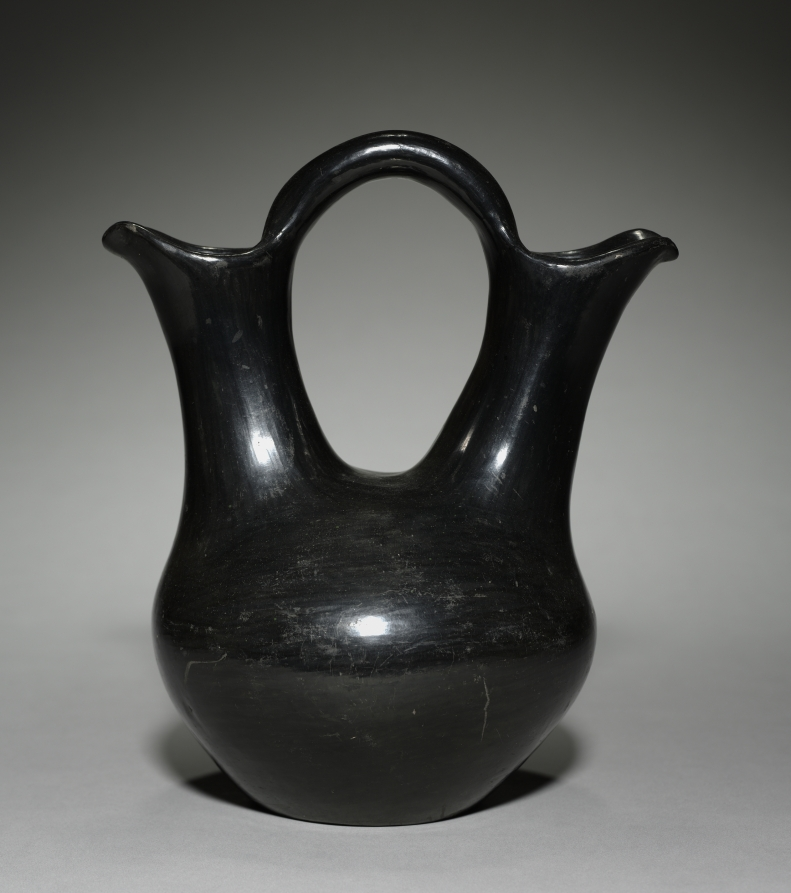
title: Wedding Jar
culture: Southwest, Pueblo, Santa Clara, Post-Contact, 20th century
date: c. 1900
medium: ceramic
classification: Ceramic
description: At Santa Clara Pueblo, the double-spouted wedding jar is made not only to sell but also for use during its namesake ceremony, when the bride and groom drink from opposite spouts. The origin of the unusual form is unclear; once considered a modern innovation, it may instead be an ancient form revived in the late 1800s, perhaps in response to market forces that tourism set in play. This example is made from the black ware for which Santa Clara potters are known.